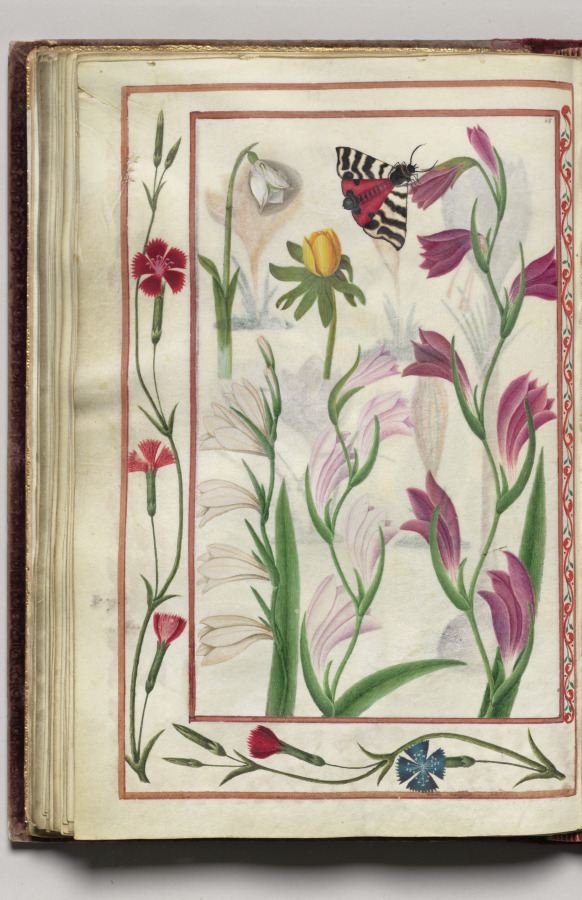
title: Snow Drop, Winter Aconite, and Moth with Dianthus Border, folio 34 (verso), from Florilegium (A Book of Flower Studies)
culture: France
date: 1608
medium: watercolor, ink, silver, and gold over occasional traces of pencil, on vellum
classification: Bound Volume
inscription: Dated: Poitiers 1608 (on frontispiece) Signed: On frontispiece in black ink, lower right: Van Kuyk Notation on drawing: Frontispiece: in pencil, lower margin: * élève de Van Kessel, peintre flammand (* in pencil also appears in front of Van Kuyk's name).